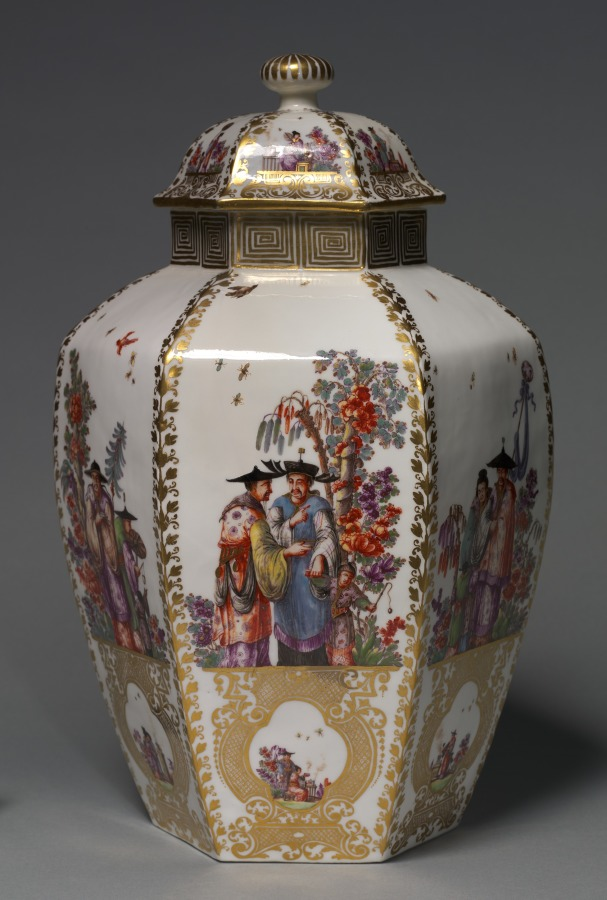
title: Covered Vase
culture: Germany, Meissen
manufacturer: Meissen Porcelain Factory (German, est. c. 1710)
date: c. 1728–30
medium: porcelain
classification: Ceramic